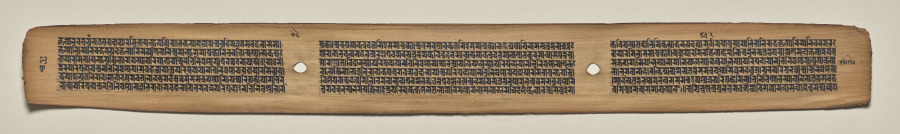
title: Text, Folio 99 (verso), from a Manuscript of the Perfection of Wisdom in Eight Thousand Lines (Ashtasahasrika Prajnaparamita-sutra)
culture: Eastern India, Bihar, Vikramashila Monastery. Painting: Nepal, Kathmandu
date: Sunday, September 14, 1119 (year 239 of the Newar Samvat in the month of Ashvina)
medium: gum tempera and ink on palm leaves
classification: Painting